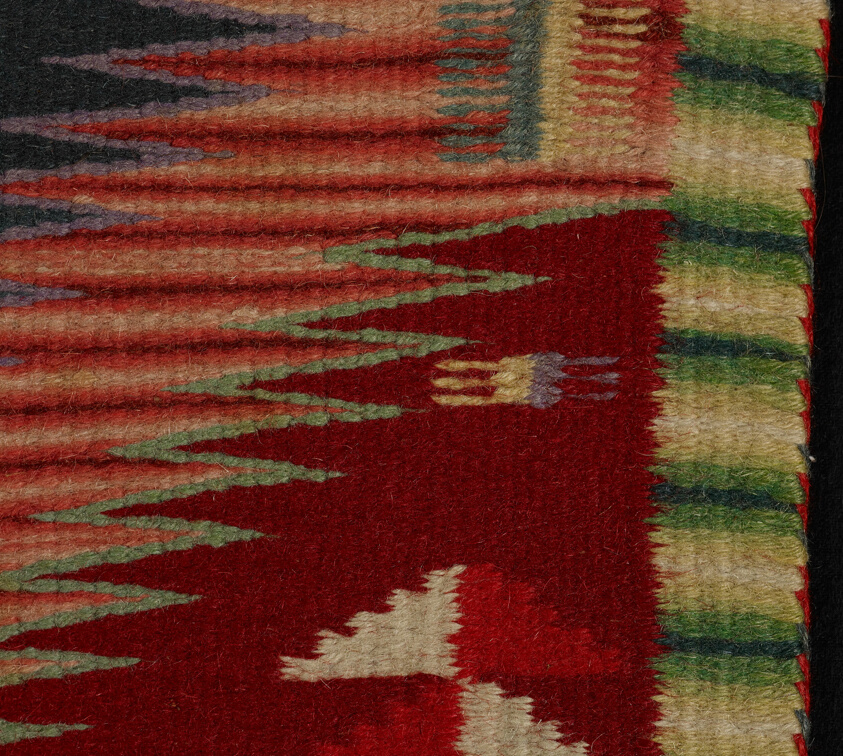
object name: Textile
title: "Eye-Dazzler" Weaving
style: navajo, native american, americas, Folk Art, 19th century, indigenous, north american, native north american, eye-dazzler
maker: Navajo (Diné) (Arizona, New Mexico, and Utah, United States)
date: 1880/1900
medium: Cotton and wool, single interlocking tapestry weave; twined selvages and heading, overcast finish terminating in tassels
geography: Navajo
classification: textile; weaving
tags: geometric, zigzags